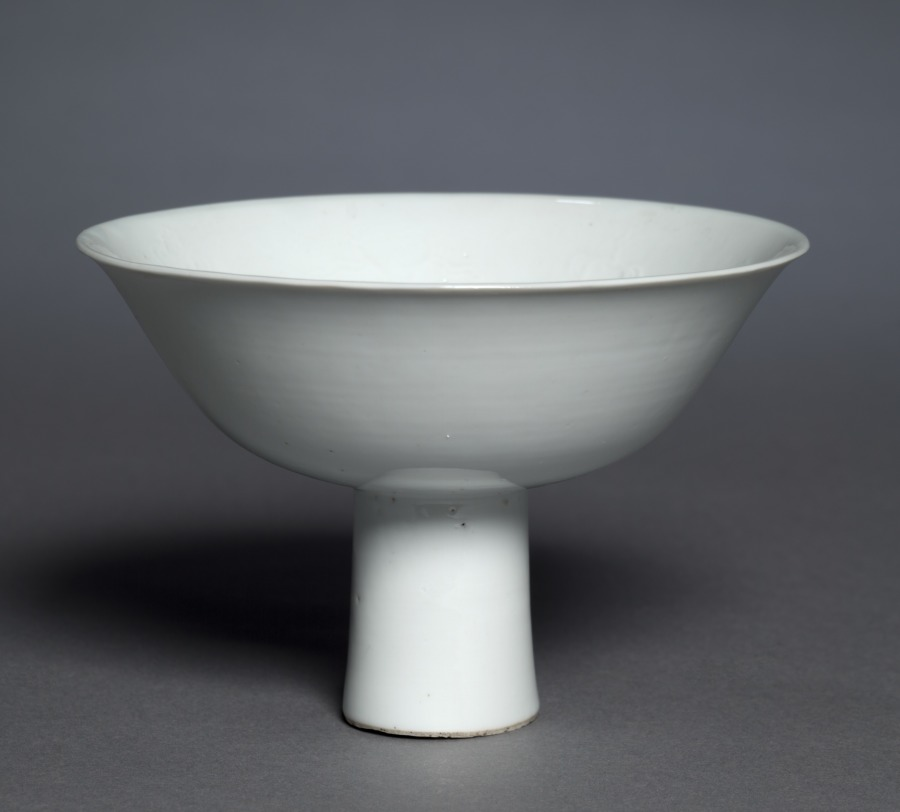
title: Stem Cup with Buddhist Emblems: Shufu Ware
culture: China, Jiangxi Province, Yuan dynasty (1271–1368)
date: 1300s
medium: porcelain with molded decoration and white glaze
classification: Ceramic